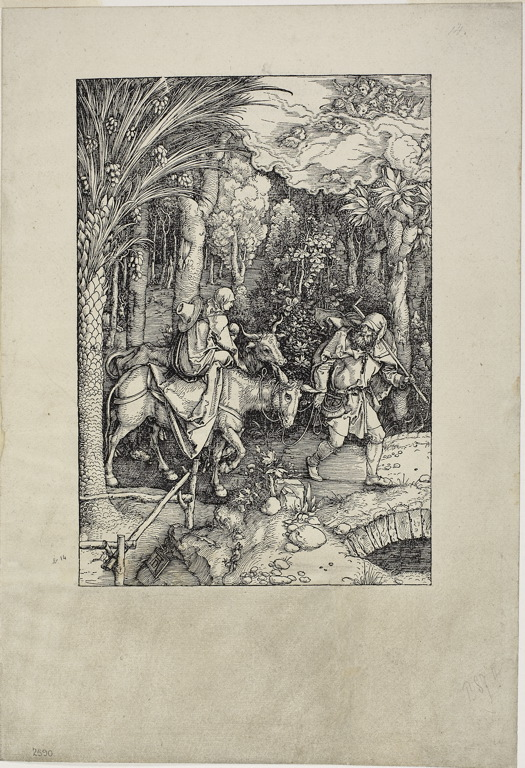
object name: Print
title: The Flight into Egypt, from the Life of the Virgin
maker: Albrecht Dürer (German, 1471-1528)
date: c. 1504–05, published 1511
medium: Woodcut in black on ivory laid paper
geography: Germany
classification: woodcut; print; prints and drawing; paper